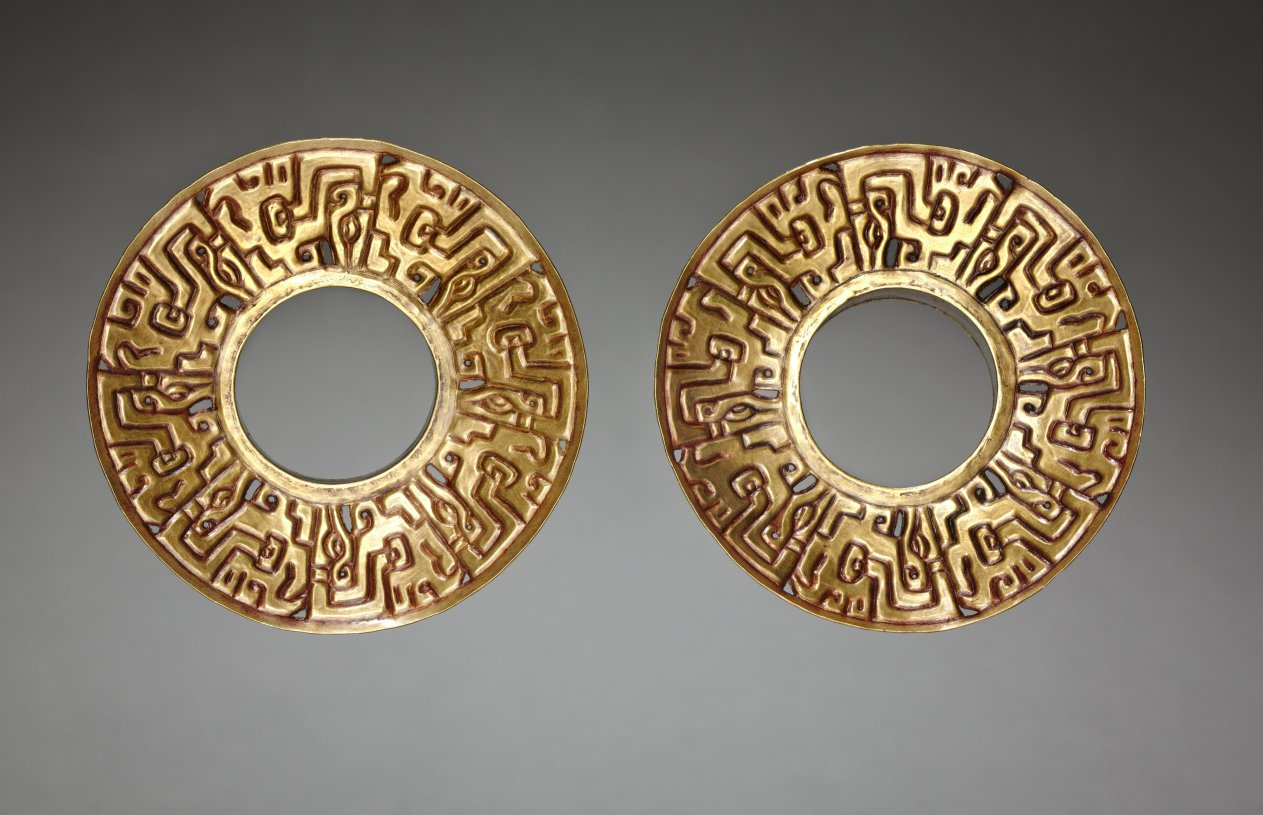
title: Pair of Ear Ornaments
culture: Peru, North Highlands, Chavín de Huantar(?), Chavín style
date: c. 500–200 BCE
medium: hammered and cut gold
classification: Metalwork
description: There seems to be a link between Chavín religion and appearance of the Andes’ first large precious-metal objects, made using revolutionary new metallurgical processes. Chavín may have developed these technical innovations to express the inexpressible, the "wholly other" nature of its religion. In many areas, elite men and women wore the ornaments as emblems of their ties to this religion, and eventually were buried with them. These 16 objects, along with three others not in the museum’s collection, are said to have come as a group from Chavín itself.